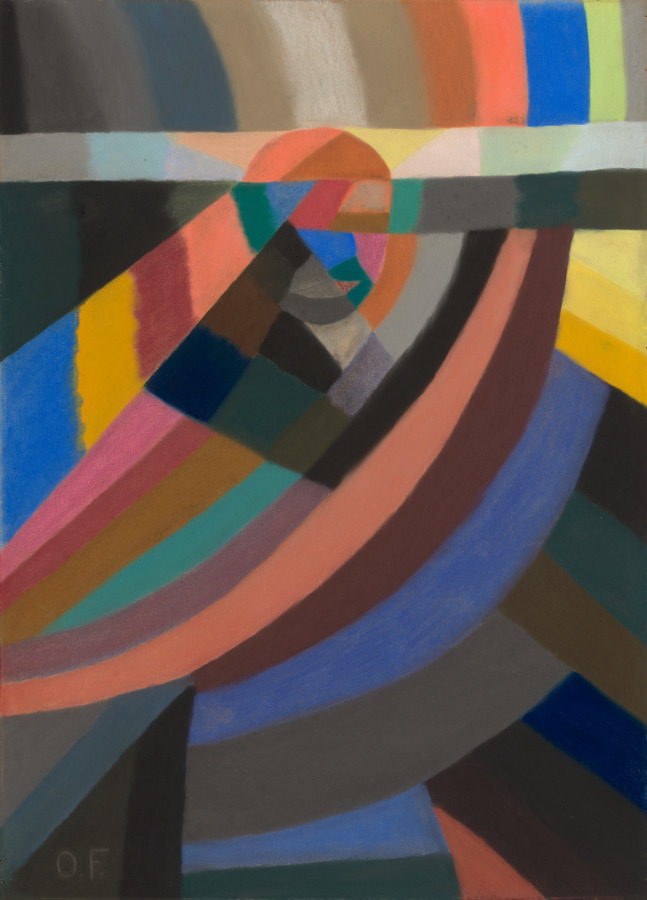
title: Composition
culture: Germany, 20th century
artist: Otto Freundlich (German, 1878–1943)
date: 1924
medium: pastel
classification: Drawing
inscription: signed lower left: O. F. [signed on back: Otto Freundlich / Paris 1924]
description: After studying art in Germany and Italy, Freundlich visited Paris for the first time in 1908, and worked alongside avant-garde writers and artists such as Apollinaire, Braque, and Picasso in the bohemian district of Montmartre. Freundlich painted his first purely abstract works in 1911 and henceforth became committed to pioneering abstraction. His work was included in groundbreaking exhibitions before and after World War I in Berlin, Munich, and Paris. Some of his most lyrically intense pastels—such as Composition—were made in 1924 following a trip to Paris when he participated in the Salon des Indépendants.